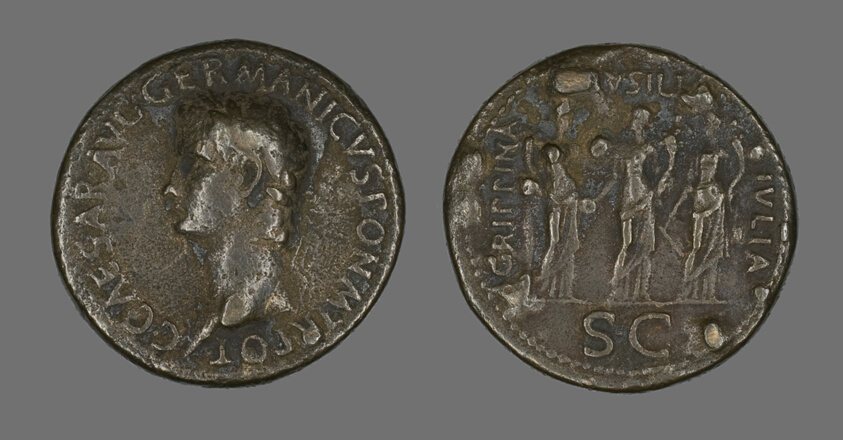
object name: Coin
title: Sestertius (Coin) Portraying Emperor Gaius (Caligula)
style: imperial (roman), ancient, roman (ancient, style or period)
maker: Roman, minted in Rome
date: 37-38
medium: Bronze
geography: Rome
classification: coin; ancient art